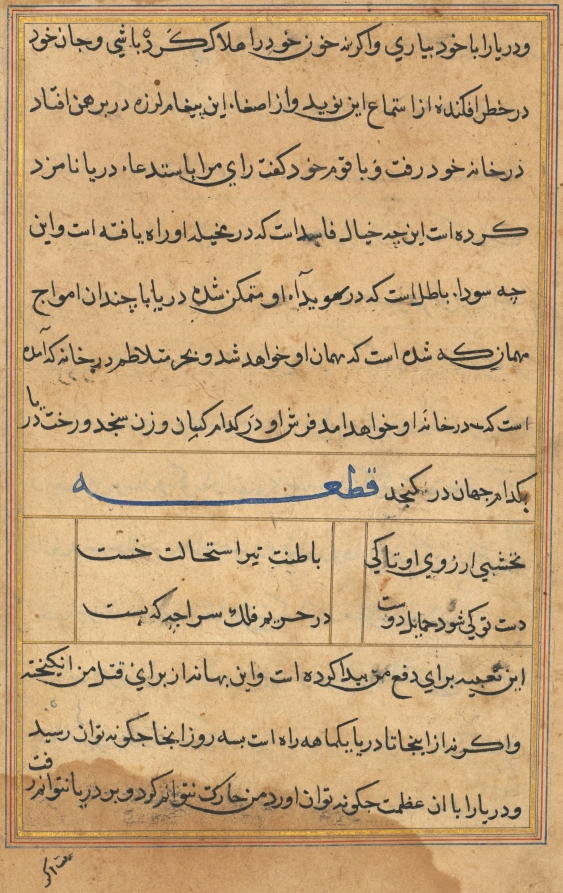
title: Page from Tales of a Parrot (Tuti-nama): text page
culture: Mughal India, court of Akbar (reigned 1556–1605)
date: c. 1560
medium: gum tempera, ink, and gold on paper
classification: Painting